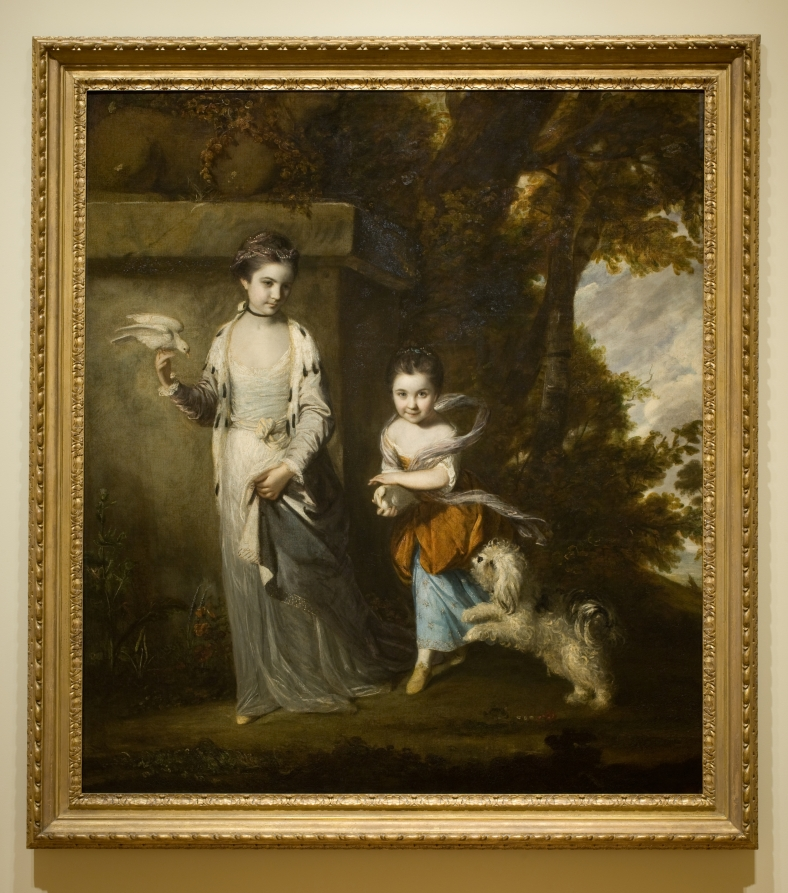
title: Portrait of the Ladies Amabel and Mary Jemima Yorke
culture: England, 18th century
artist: Joshua Reynolds (British, 1723–1792)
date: c. 1761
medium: oil on canvas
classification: Painting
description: Sisters Amabel (left) and Mary Jemima are shown playing on the grounds of their family’s country estate outside London. They wear loose, flowing garments invented specifically for the portrait rather than their usual outdoor dresses. Their father commissioned the painting to hang in the family’s city home in London’s St. James Square and it highlights their status as landowners. Joshua Reynolds painted this portrait after his return from Italy, where his studies inspired him to incorporate classical references. The famous ancient Roman Statue of a Girl with a Dove is echoed in Mary Jemima’s pose as she shields a dove from the family dog.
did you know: Her family affectionately referred to Mary Jemima (at right) as "Mouse."